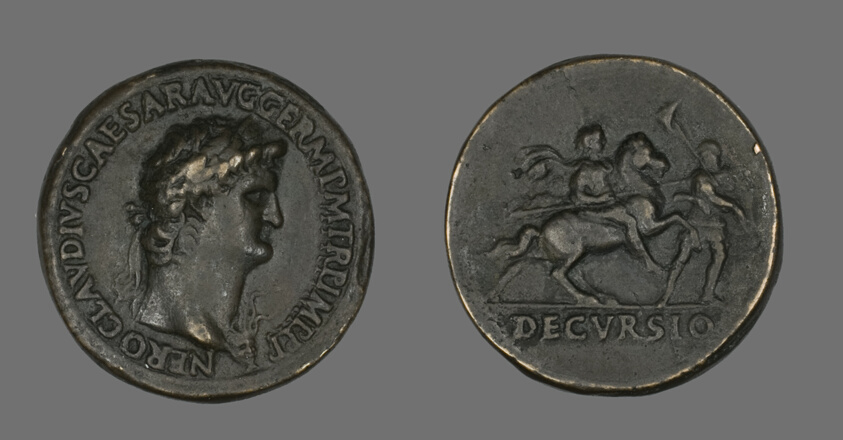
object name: Coin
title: Sestertius (Coin) Portraying Emperor Nero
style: imperial (roman), ancient, roman (ancient, style or period)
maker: Roman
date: 54-69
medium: Bronze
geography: Roman Empire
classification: coin; ancient art